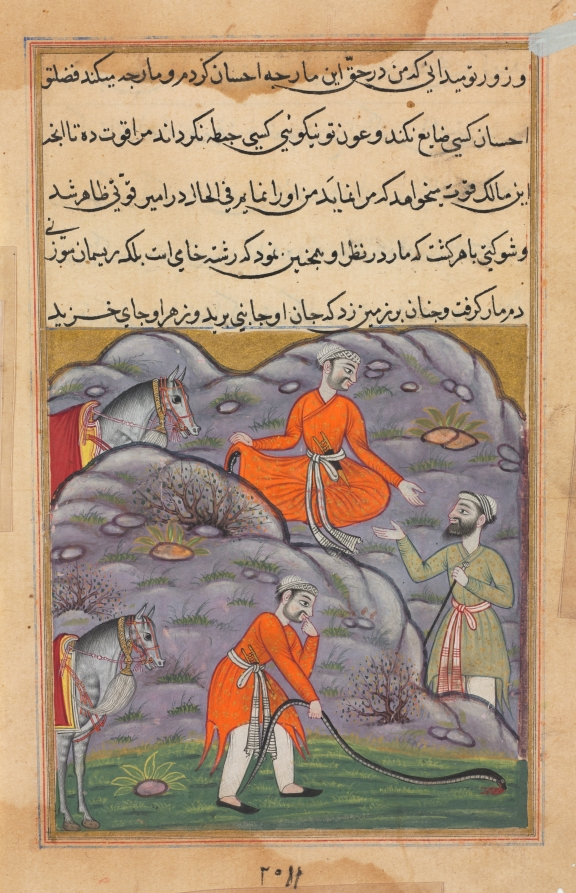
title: The emir slays the snake after giving it shelter, from a Tuti-nama (Tales of a Parrot): Forty-fifth Night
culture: Mughal India, court of Akbar (reigned 1556–1605)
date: c. 1560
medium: gum tempera, ink, and gold on paper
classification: Painting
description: In the upper register, the emir addresses the snake’s owner. The snake itself hides, barely visible beneath the edge of the emir’s orange robe. In the bottom scene, the emir dashes the snake on the ground having realized that the dangerous animal planned to kill him.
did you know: The previous folio, showing Khujasta addressing Tuti the parrot, is currently in the collection of the National Museum of Asian Art-Freer Gallery of Art, Smithsonian Institution in Washington, DC.